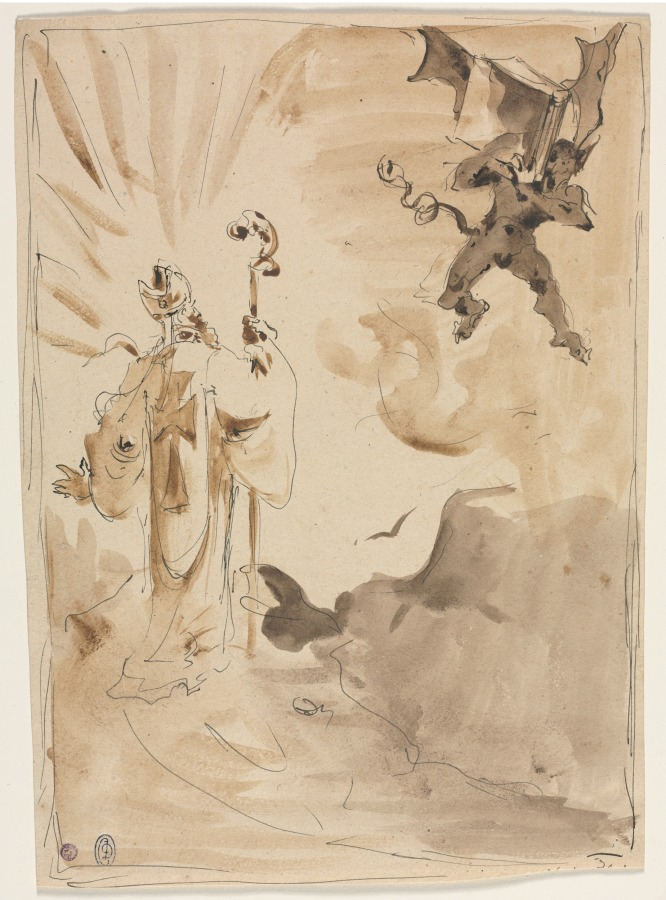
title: The Bishop and the Demon (recto); Three Demons Holding a Knight (verso)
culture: Italy, 20th century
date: 1900s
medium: pen and black ink and brush and brown wash (two different colors brown wash)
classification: Drawing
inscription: verso: upper right, in graphite: 0.15